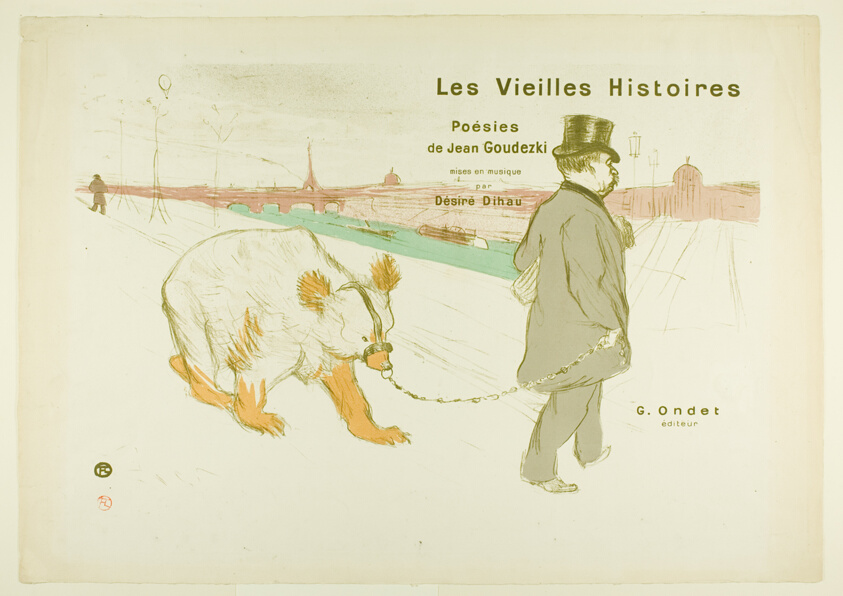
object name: Print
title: Cover and Frontispiece to Les Vieilles Histoires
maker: Henri de Toulouse-Lautrec (French, 1864-1901)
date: 1893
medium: Color lithograph on cream wove paper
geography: France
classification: lithograph; print; prints and drawing